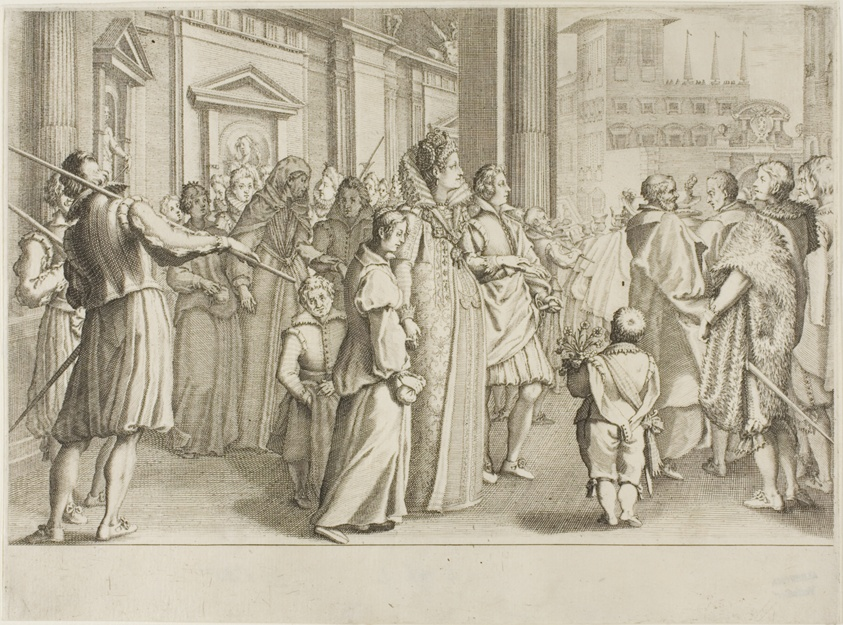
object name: Print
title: The Grand Duchess Christine of Lorraine Escorts to the Church Youths Whom She is Taking Under Her Protection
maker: Jacques Callot (French, 1592-1635)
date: 1616/20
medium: Engraving on paper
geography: France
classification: engraving; print; prints and drawing